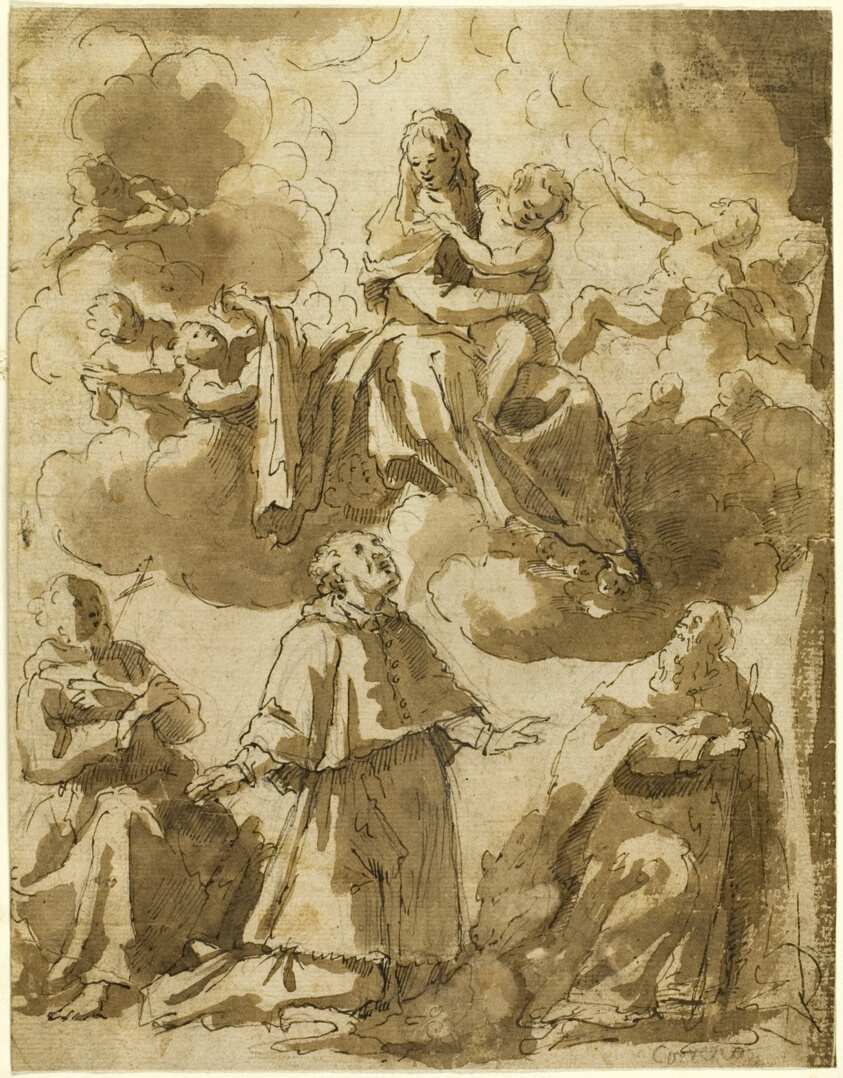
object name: Drawing and Watercolor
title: Madonna and Child in Glory, with Three Male Saints Below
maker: After Francesco Vanni; Italian, 1563-1610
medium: Pen and brown ink, with brush and brown wash over black chalk, on buff laid paper, tipped onto ivory wove paper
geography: Italy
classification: drawings (visual works); prints and drawing